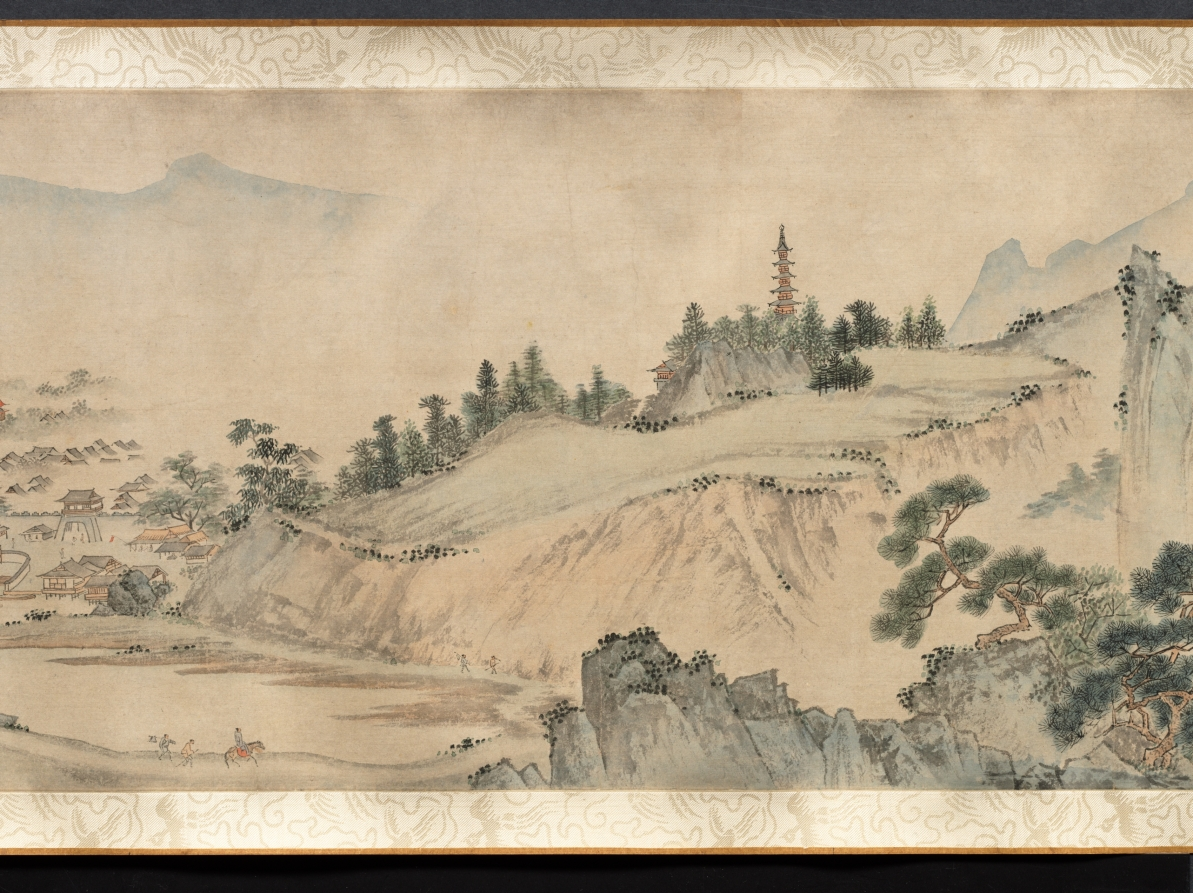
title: Ten Thousand Li of the Yangzi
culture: China, Ming dynasty (1368–1644)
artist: Dai Jin (Chinese, 1388–1462)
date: c. 1400s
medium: Handscroll; ink and color on paper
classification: Painting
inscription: Two colophons at end. Artist's seals: Dai Jin 戴進 and Wenjin 文進.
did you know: Dai Jin is traditionally considered the founder of the Zhe School, a style of landscape painting.